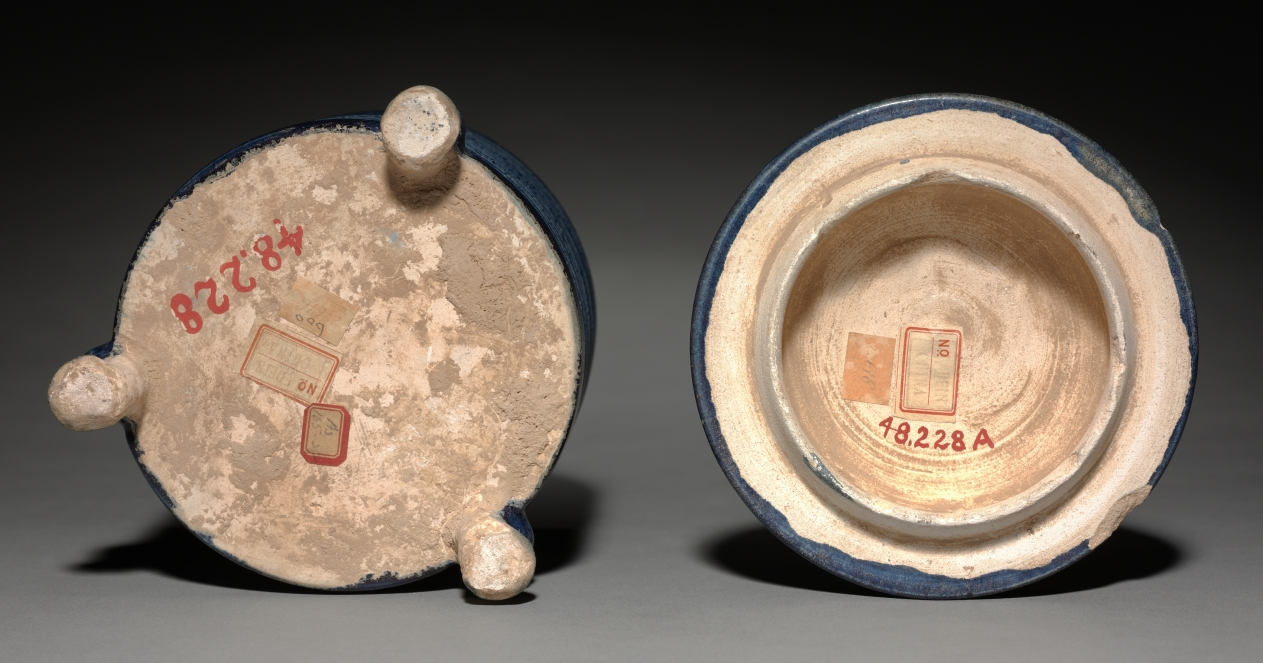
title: Covered Jar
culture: China, Tang dynasty (618–907)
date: early 700s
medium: glazed earthenware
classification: Ceramic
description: This covered cylindrical jar with three animal feet is lavishly covered with a cobalt blue glaze in the exterior and an amber glaze in the interior. Of the colored lead glazes of sancai (three-color) ware, blue was preeminent and precious. Imported cobalt from Persia (Iran, Afghanistan) was used as a glaze colorant that yields a rich, brilliant blue of considerable splendor.